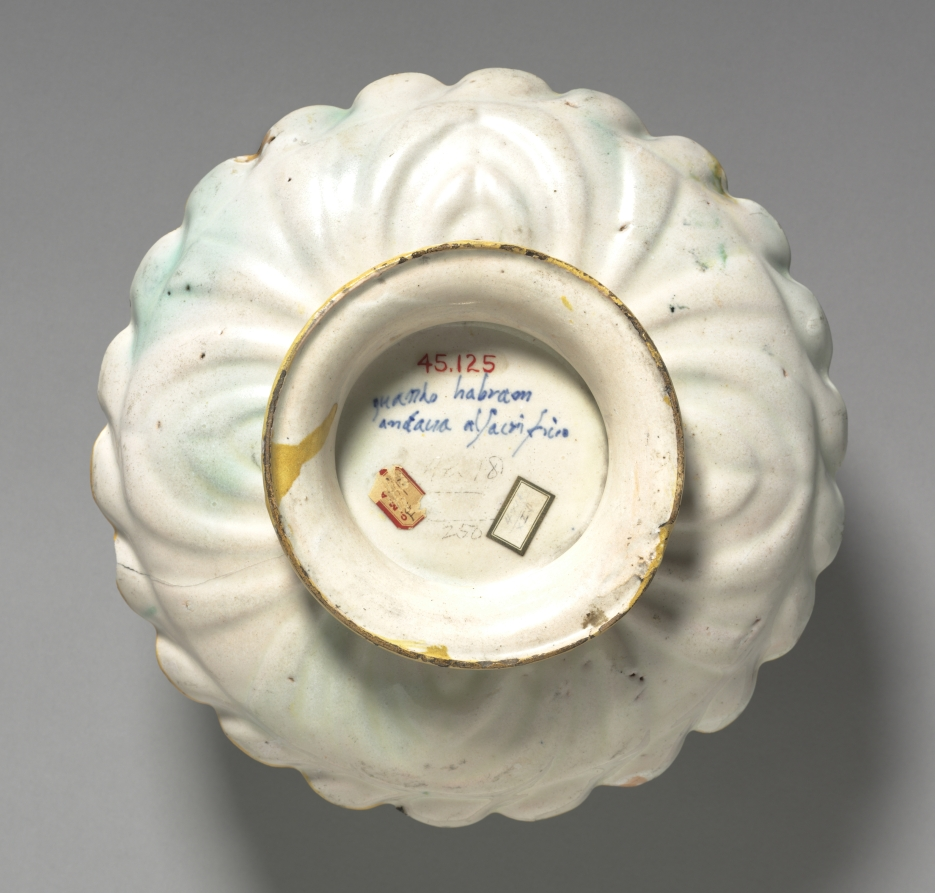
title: Footed Dish Depicting Abraham and Isaac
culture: Italy, Urbino region, Castel-Durante, 16th century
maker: circle of Ludovico and Angelo Picchi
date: c. 1545–63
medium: tin-glazed earthenware (maiolica)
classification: Ceramic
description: During the Renaissance, scenes from the Christian Bible were prominently featured on maiolica, covering the surface in a style called istoriato (decorated with stories). This plate depicts a scene an Old Testament narrative in which Abraham believes that God wants him to sacrifice his son Isaac. Before he can carry out the deed, God sends a ram to sacrifice instead.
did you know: The shape of this dish imitates the fluted, curving shape of sixteenth-century metalwork.